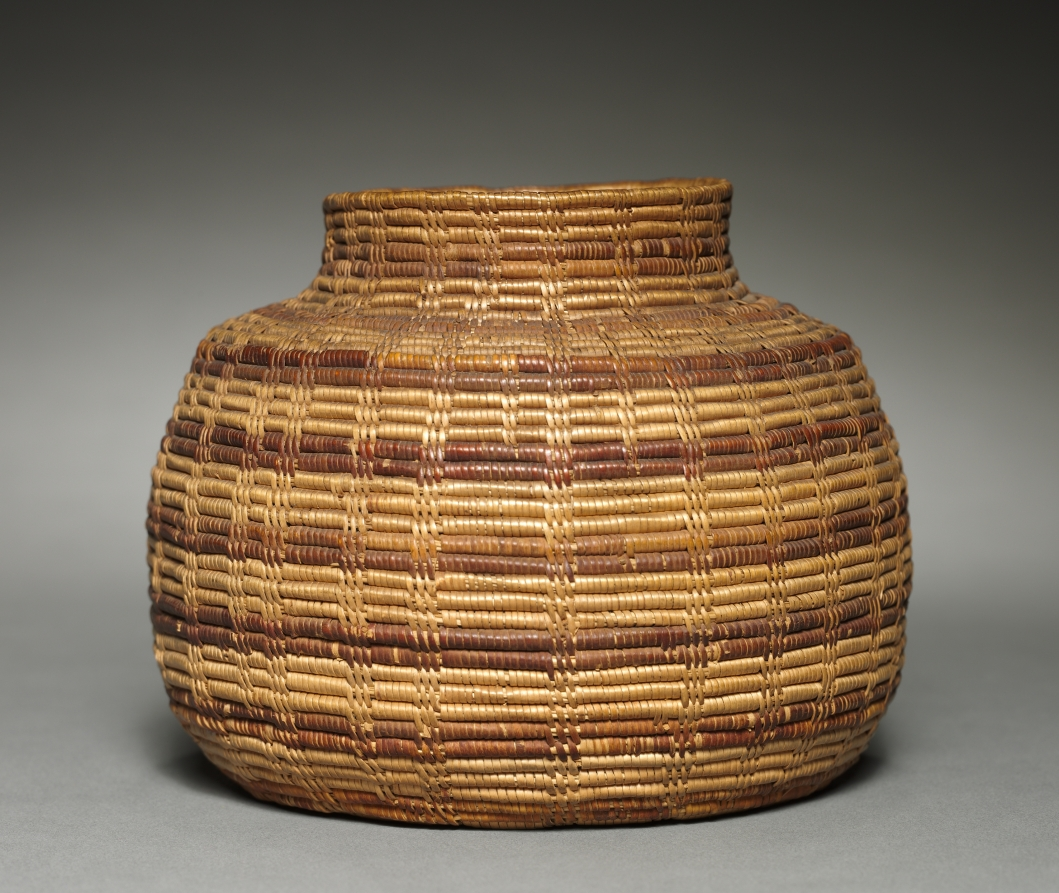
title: Jar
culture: California, Tübatulabal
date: 1895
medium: Sumac, yucca root; coiled, skip-stitch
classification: Basketry